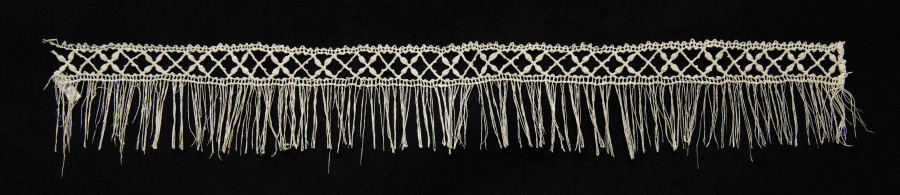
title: Lace Insertion with Fringe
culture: Italy, Genoa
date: 1550–99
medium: Linen: bobbin lace (needle lace, reticella design)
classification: Lace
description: Although this fringed bobbin lace fragment is made of linen, its format is like those for laces made of gold, silver, and colored silk threads.